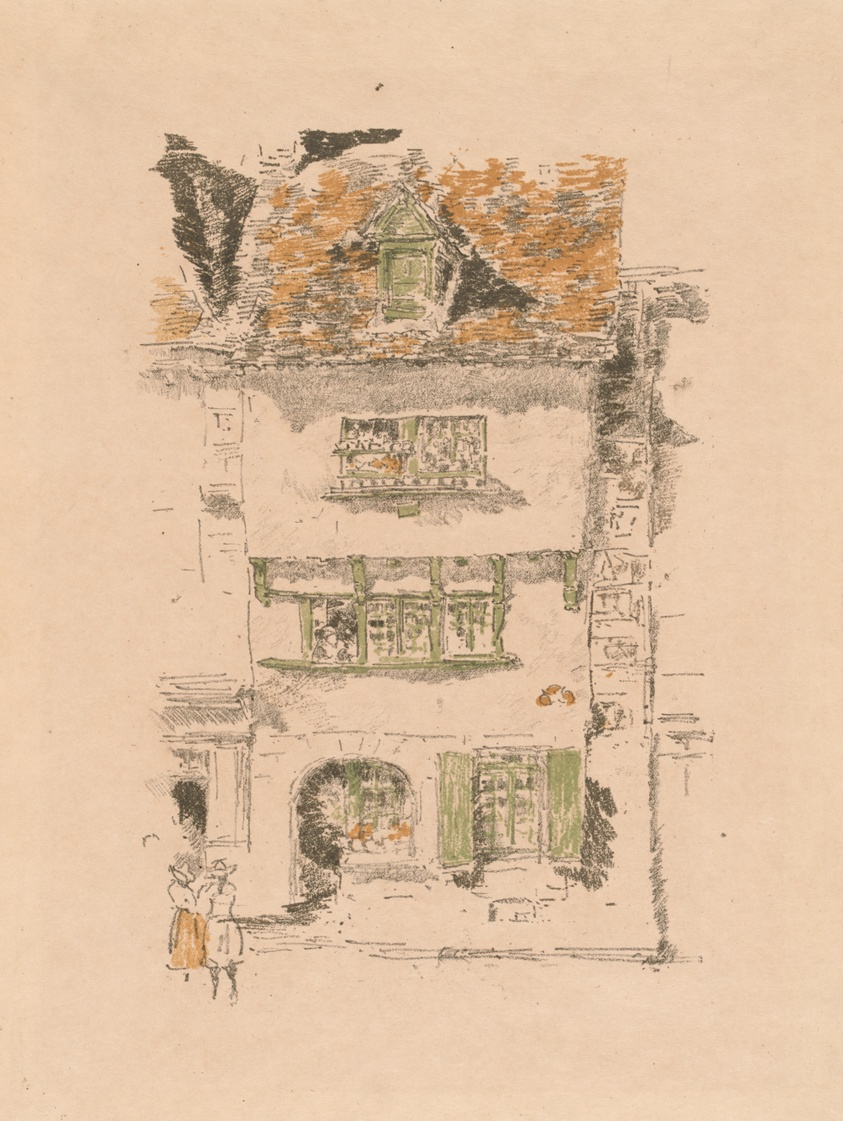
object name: Print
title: Yellow House, Lannion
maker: James McNeill Whistler (American, 1834-1903)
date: 1893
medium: Transfer lithograph from four stones, in black (keystone), green, yellow, and gray, with scraping, on cream wove Japanese vellum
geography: United States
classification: transfer lithograph; lithograph; print; prints and drawing